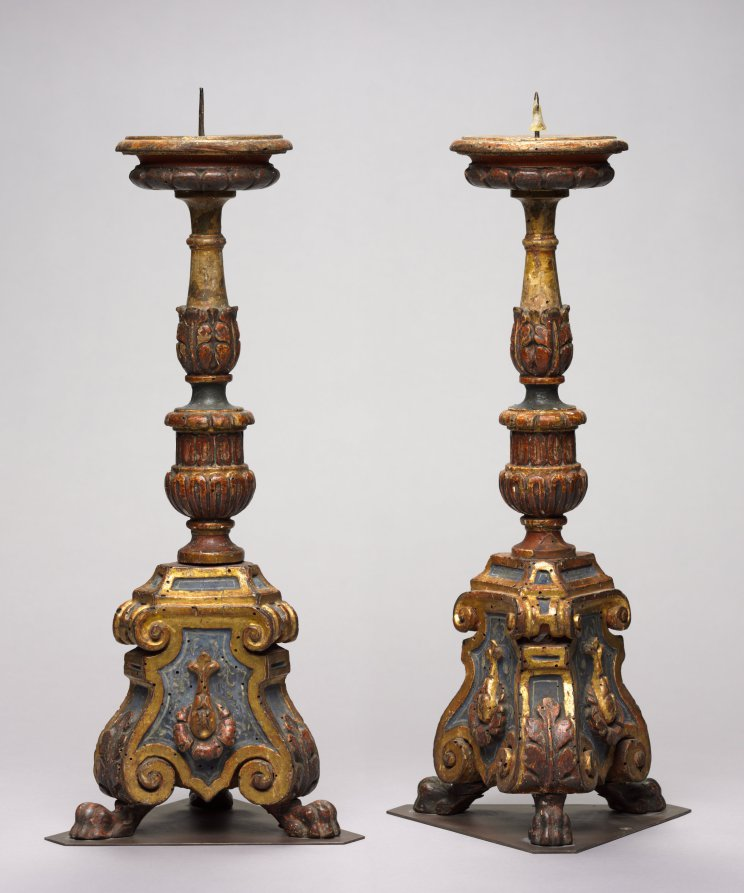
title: Pair of Candlesticks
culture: Italy, probably Tuscany, late 15th century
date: late 1400s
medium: carved and gilded wood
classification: Furniture and woodwork